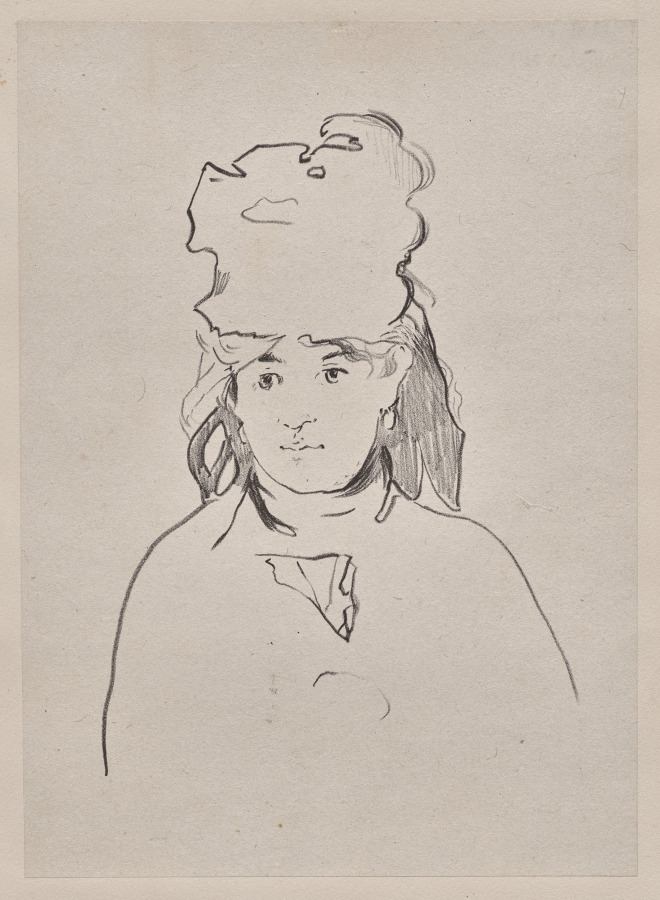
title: Berthe Morisot in Silhouette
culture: France, 19th century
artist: Édouard Manet (French, 1832–1883)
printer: Auguste Clot (French, 1858–1936)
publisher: Lemercier & Cie.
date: about 1872–74, printed 1884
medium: lithograph on chine collé, laid down on wove paper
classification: Print